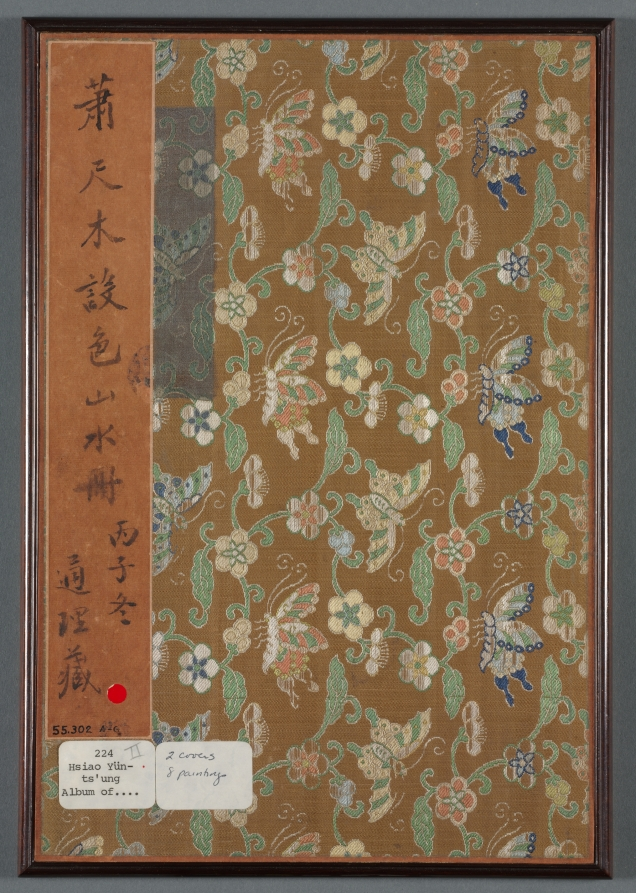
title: Album of Seasonal Landscapes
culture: China, Qing dynasty (1644-1911)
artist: Xiao Yuncong (Chinese, 1596–1673)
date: 1668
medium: Album of eight leaves; ink and light color on paper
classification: Painting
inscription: Artist's inscription, signature, and seals on each leaf.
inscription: 9 additional seals: 2 of Chen Yixi 陳奕禧 (1646-1709); 4 of Li Yufen 李玉棻 [Li Yunhu 李韵湖] (active mid-1800s); 3 unidentified.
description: Throughout his lifetime, Xiao Yuncong visited Nanjing and Yangzhou, cities embedded in the fertile and water-rich Jiangnan region, as reflected in his paintings. Xiao painted from nature, and his landscapes are informed by the seasons and his travels, as well as by his experience as a print designer. Xiao’s fresh, light colors continue to appear in later Shanghai school paintings. This album was formerly in the collection of Li Yufen in Yangzhou and then owned by Wu Hufan in Shanghai. While the artist impressed his seal consistently below his poetic inscriptions in the upper parts of the composition, the red seals on the margins and in the lower corners of the paintings are impressions by the album’s previous owners.